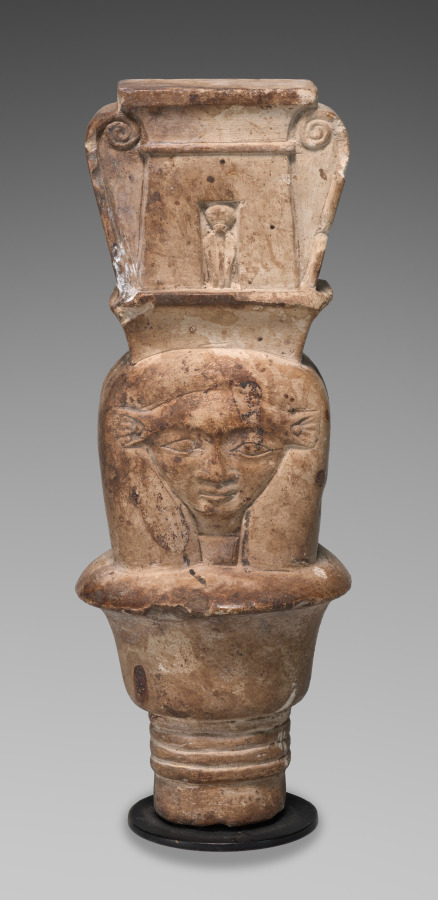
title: Votive Hathor Column Capital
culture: Egypt, Late period (715–332 BCE), Dynasty 30–Greco-Roman period (332 BCE–395 CE), Ptolemaic dynasty (305–30 BCE)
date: 380–30 BCE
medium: limestone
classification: Sculpture